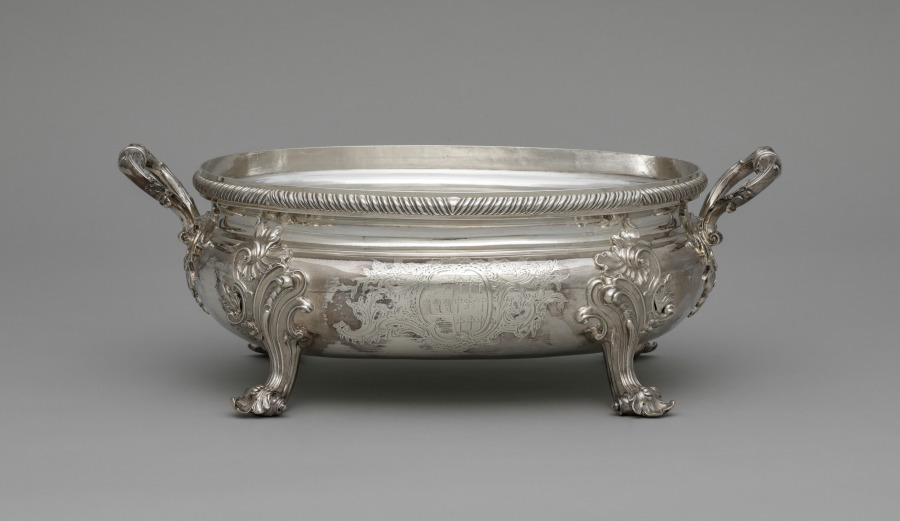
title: Tureen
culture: England, 18th century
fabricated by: Edward Wakelin (British, 1784)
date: 1753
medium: silver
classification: Silver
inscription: engraved coat of arms of Admiral Edward Vernon of Nacton (1684-1757) and his wife Sarah, daughter of Thomas Best. Engraved on cover is Vernon crest, a woman holding a scythe.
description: A very successful silversmith, Edward Wakelin may have been more a businessman than a craftsman or designer.